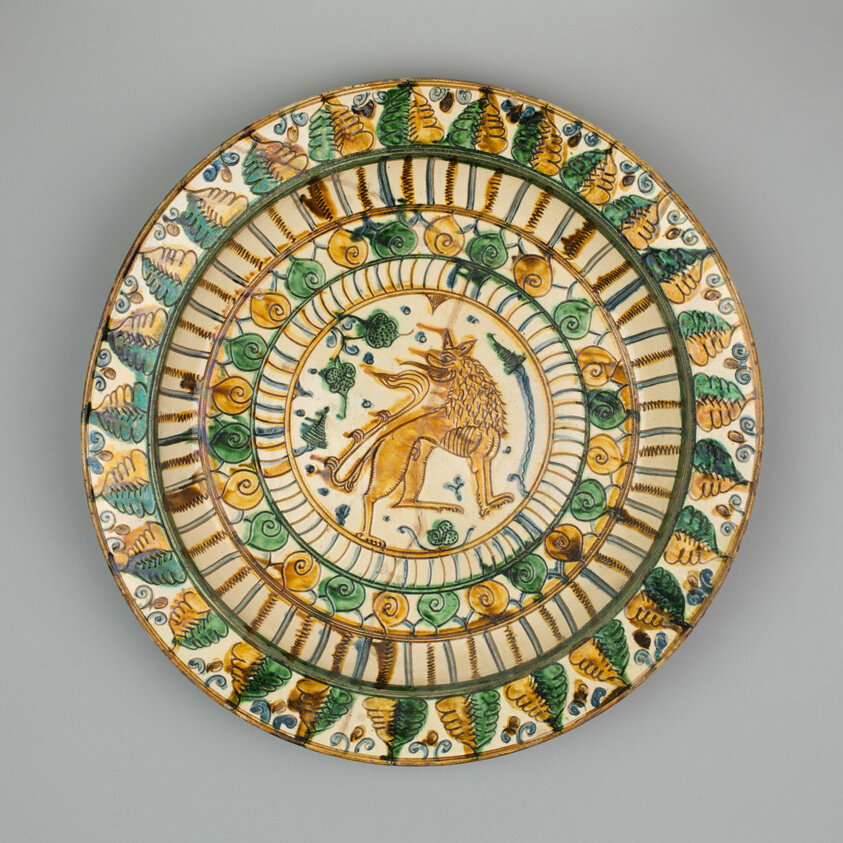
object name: Ceramics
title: Dish with Rampant Lion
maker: Italian, possibly Ferrara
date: Late 15th century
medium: Lead-glazed earthenware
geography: Northern Italy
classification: earthenware; european decorative arts; ceramics; decorative arts